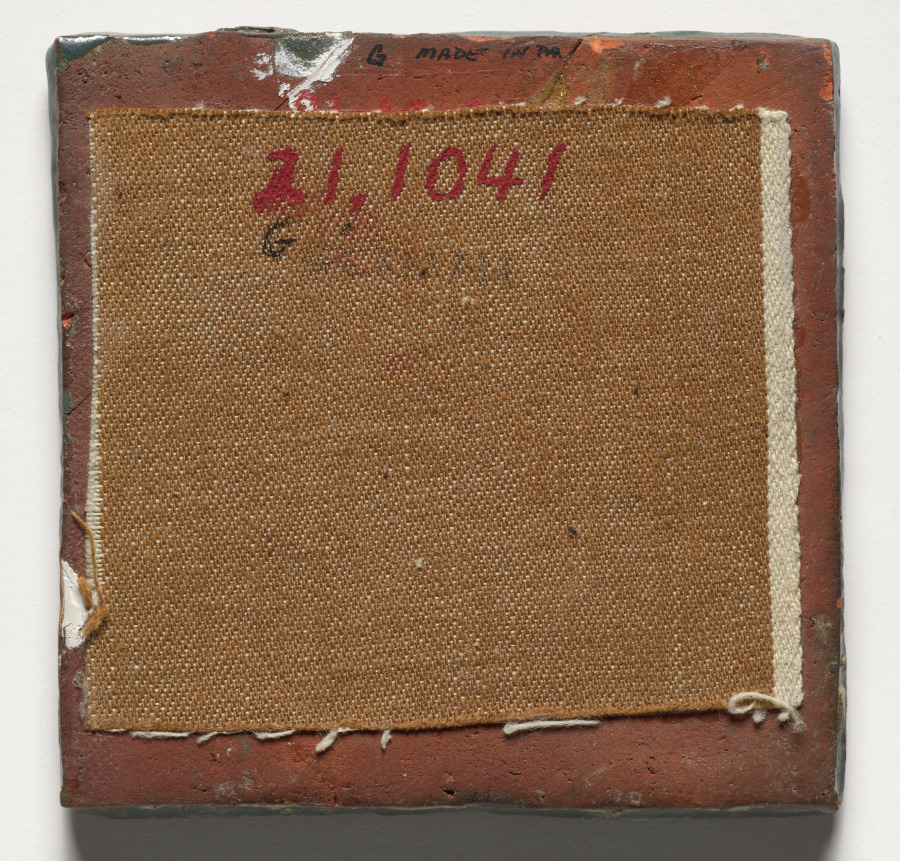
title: Tile- Dog of Nuremberg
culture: America, Pennsylvania, Doylestown, Early 20th century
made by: Moravian Pottery and Tile Works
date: before 1921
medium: glazed ceramic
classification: Ceramic